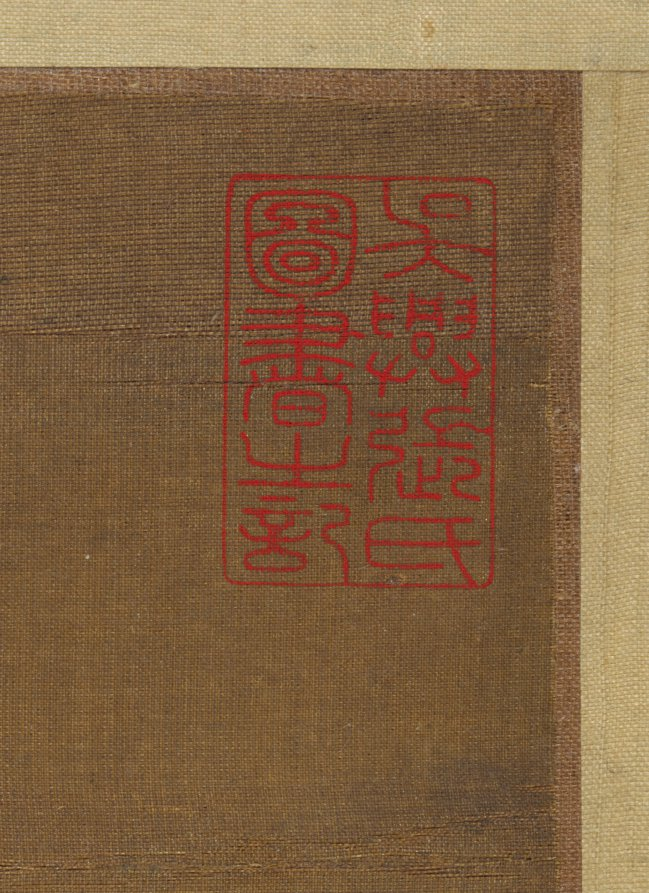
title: The Woodcutter of Luofu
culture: China, Yuan dynasty (1271-1368)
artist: Chen Ruyan (Chinese, c. 1331–1371)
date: 1366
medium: Hanging scroll; ink on silk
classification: Painting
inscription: 至正二十六年（1366）正月望後廬山汝言為思齊斷事寫羅浮山樵圖。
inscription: 2 colophons and 18 additional seals: 5 seals of Wang Shimin 王時敏 (1592–1680); 2 seals of Gong Xianglin 龔翔麟 (1658–1733); 1 colophon, dated 1684, of Yan Shengsun 嚴繩孫 (1623–1702); 1 colophon and 1 seal of Huang Ren (1683–1768); 2 seals of Lu Shusheng 陸樹聲 (3rd son of Lu Xinyuan 陸心源); 2 seals of T'ao Kuang; 1 seal of Tan Jing 譚敬 (20th c.); 3 seals of Zhang Heng 張珩 (1915–1963); 2 seals unidentified.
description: This landscape illustrates the traditionalism of Chinese painting: while the brush manner is novel, the composition is based on early Song dynasty (960-1127) models. The soft raveling brushstrokes and lumpy rock shapes are characteristic of the new 14th-century stylistic expression.